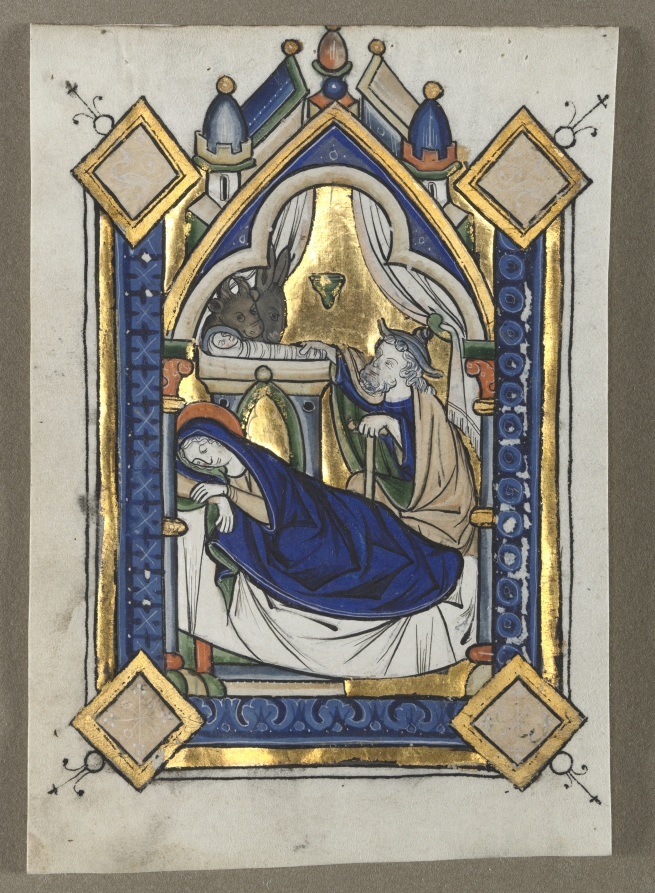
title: Leaf Excised from a Psalter: The Nativity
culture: Flanders, Liège(?), 13th century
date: c. 1260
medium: tempera and burnished gold on vellum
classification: Manuscript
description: Traditional locations within manuscript psalters were designated by decorated initials or, as is the case here, full-page miniatures. These locations marked the major divisions of the psalms as used in the daily office. The extraordinary quality of these miniatures suggests they once decorated a deluxe psalter made for a wealthy or aristocratic patron, possibly a cleric.